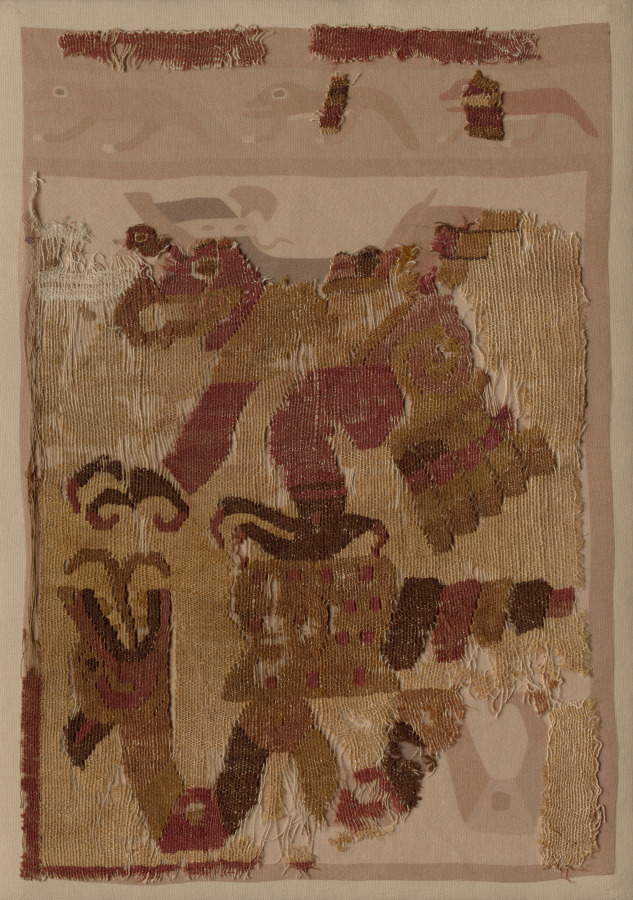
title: Textile Fragment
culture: Peru, Moche, north coast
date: c. 50–650 CE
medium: cotton and camelid fiber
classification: Textile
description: This fragment, one of several in the collection, is a rare survivor of catastrophic rains that destroyed much of the Moche textile legacy and may have helped to bring about the decline of Moche culture. It depicts a serpent and a snail beneath a hovering raptorial bird—perhaps a snail kite, a type of hawk named after its favored food. The size of the motifs implies that the original textile was large; a mantle (a shawl-like garment) or a hanging are among the possibilities.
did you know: This fragment is a rare survivor of floods that destroyed much of the Moche textile record.